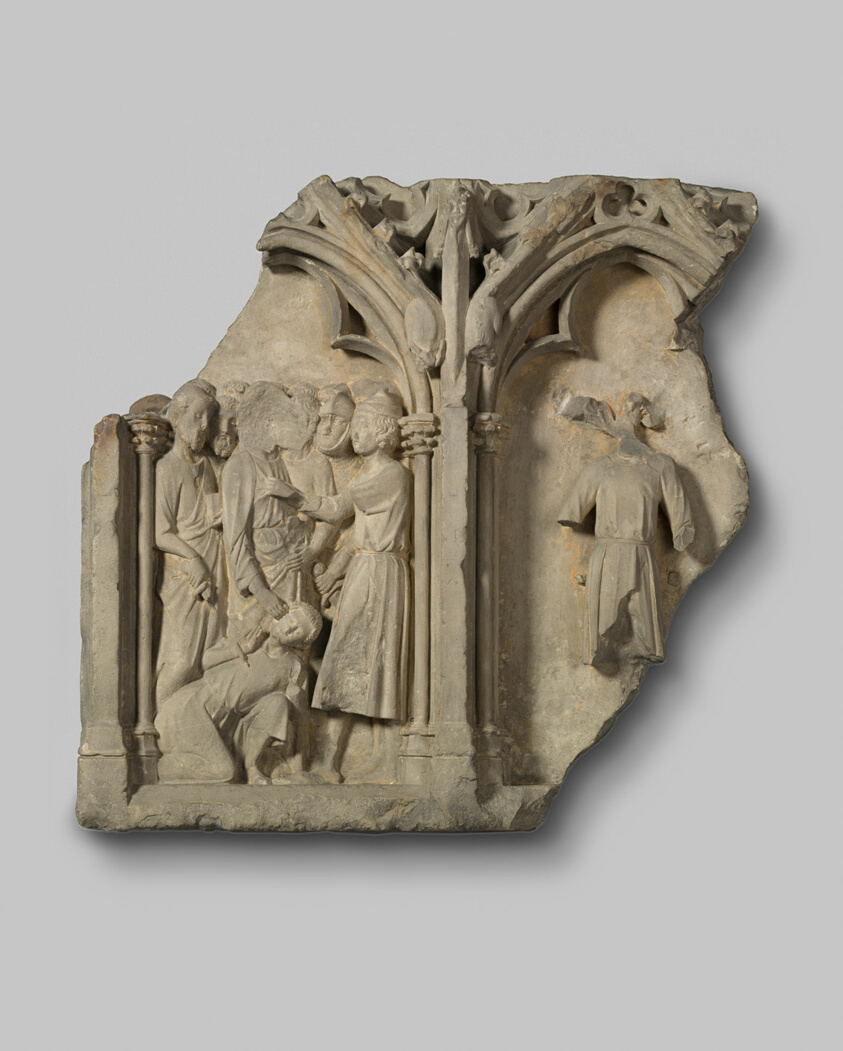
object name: Sculpture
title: Fragment of an Altarpiece with the Betrayal of Christ and the Suicide of Judas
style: 14th century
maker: French; Normandy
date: 1300/1325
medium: Limestone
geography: France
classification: relief; sculpture; architectural detail; architectural fragment; architectural sculpture; fragment; french; limestone; sculpture/stone; stone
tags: religious scenes, Christianity, Christian subjects, religious figures, religious, religion, biblical, saints, Jesus